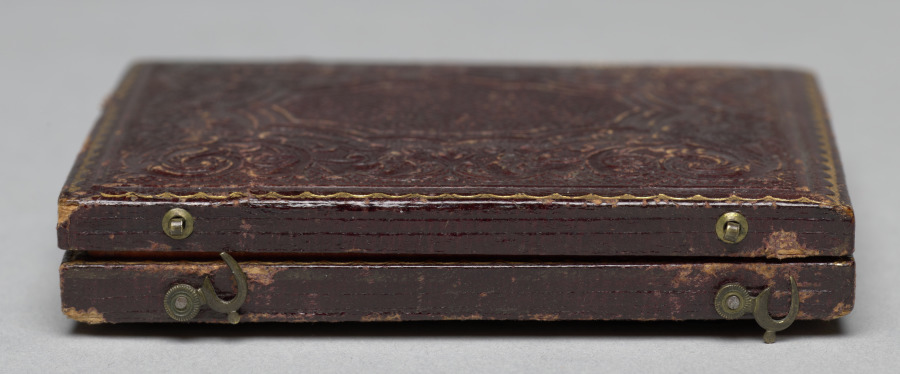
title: Seated couple in mourning attire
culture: America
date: c. 1856–58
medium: daguerreotype, sixth plate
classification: Photograph